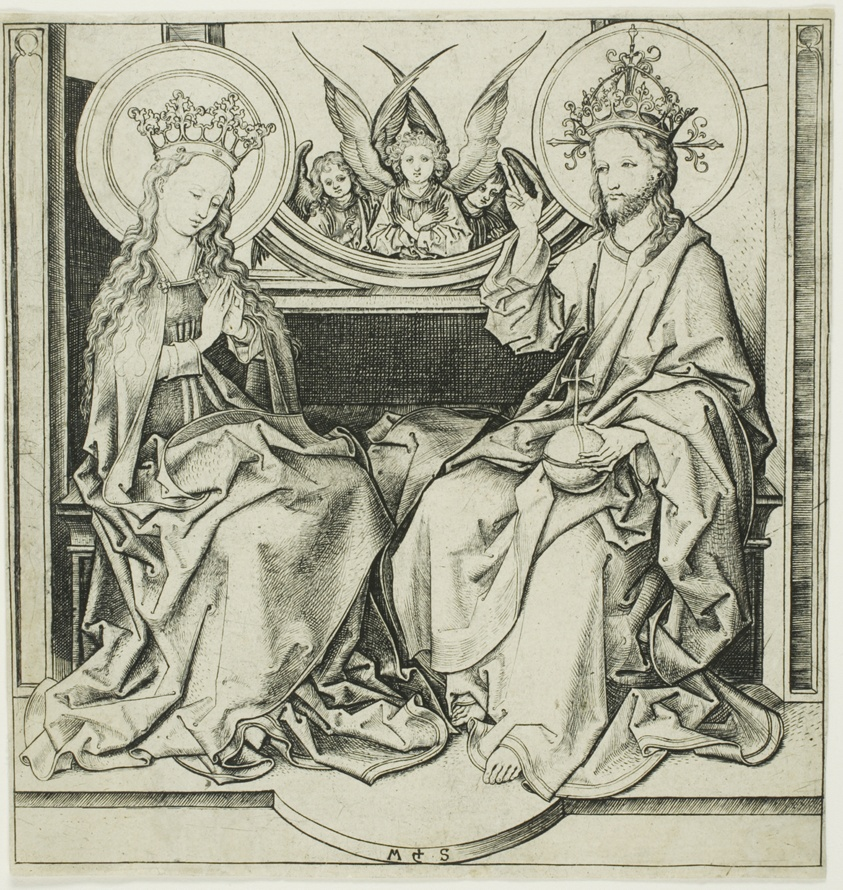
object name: Print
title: Christ Blessing the Virgin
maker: Martin Schongauer (German, c. 1430/50-1491)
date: c. 1476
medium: Engraving on paper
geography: Germany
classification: engraving; print; prints and drawing